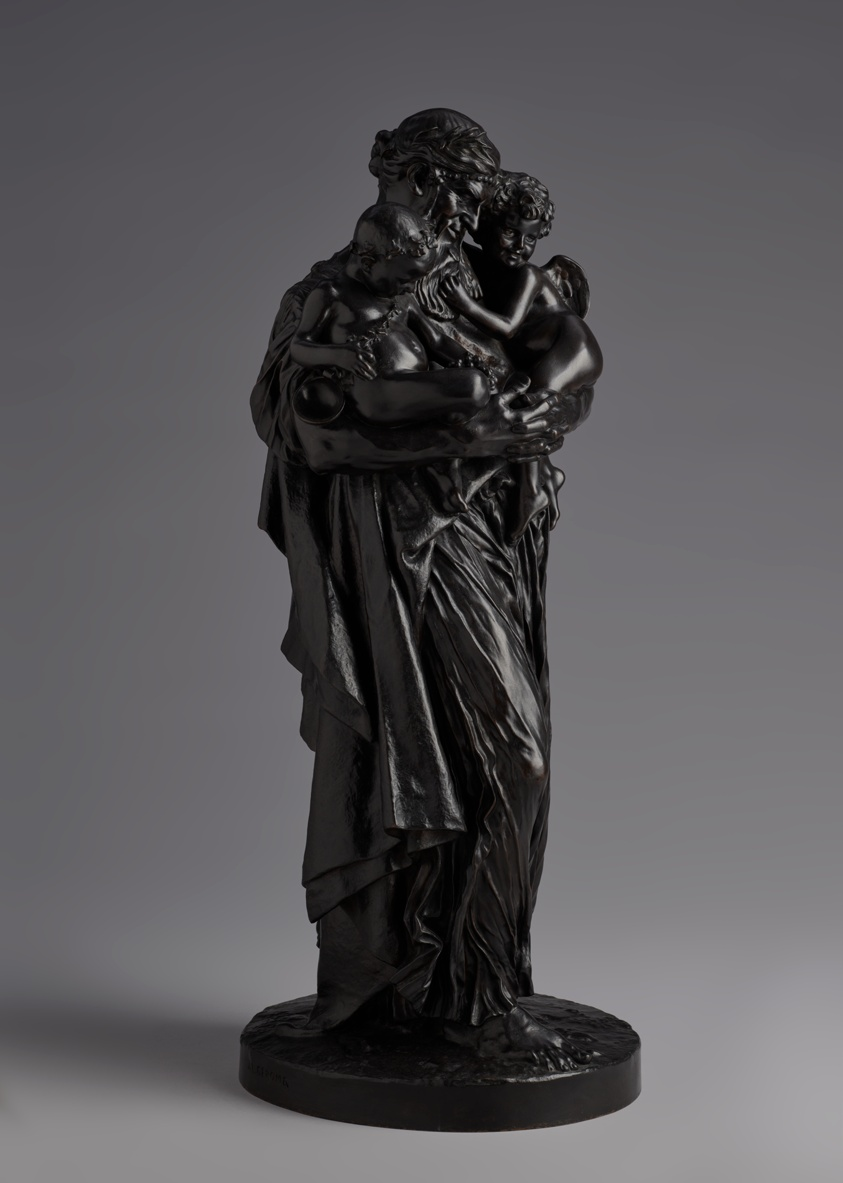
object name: Sculpture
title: Anacreon with the Infants Bacchus and Cupid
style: nineteenth century, 19th century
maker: Jean Léon Gérôme (French, 1824–1904)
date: Modeled 1878, cast c. 1893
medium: Bronze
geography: France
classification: statuette; sculpture; french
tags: mythological figures, men, children, gods (deities), mythology, cupids, man, babies, Greek gods, mythical